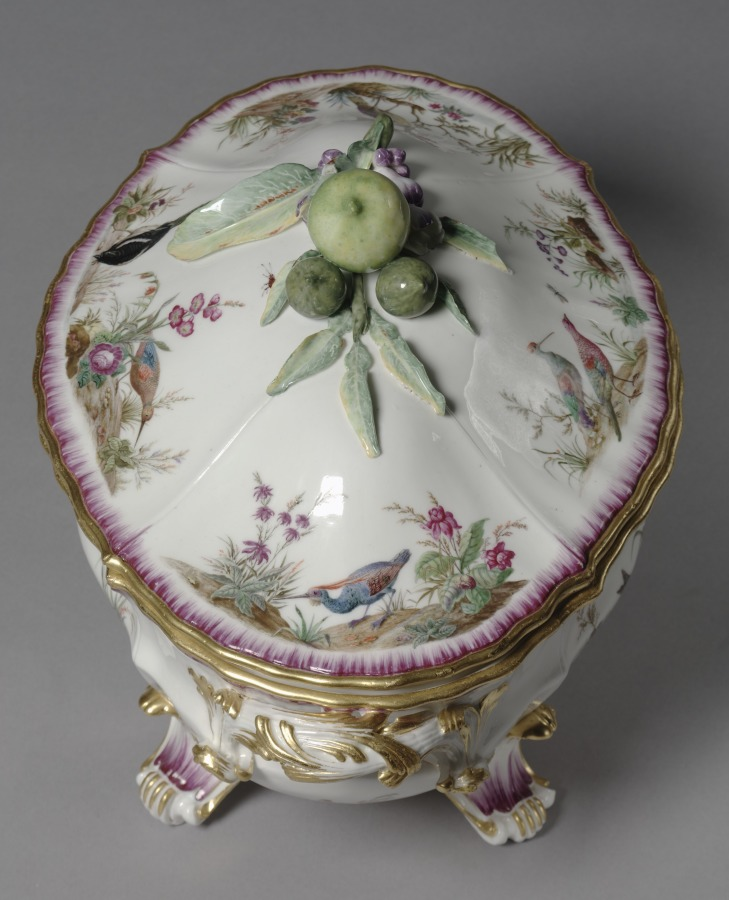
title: Covered Tureen (Terrine ancienne or Terrine ordinaire)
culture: France, Vincennes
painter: attributed to Louis-Denis Armand (French, active c. 1745–1783)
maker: Vincennes Porcelain Factory (France, 1740–56)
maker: probably by Jean-Claude Duplessis le Père (French, 1690–1774)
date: c. 1752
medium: soft-paste porcelain with enamel and gilt decoration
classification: Ceramic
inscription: [Interlaced foliate 'L's surmounted by a fleur-de-lys (indicating royal commision), in blue]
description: The intricately painted birds that decorate this tureen are the work of Louis-Denis Armand. Armand was known for his depictions of birds and landscapes, a specialty that may have come from his work as a painter of lacquered furniture with similar compositions. This tureen was likely designed by master goldsmith Jean-Claude Duplessis who began working as an artistic director at the Vincennes Porcelain Factory in 1748.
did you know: This object was manufactured in soft-paste porcelain, a material used by many European porcelain factories before they were able to emulate the hard-paste porcelain of China and Japan.